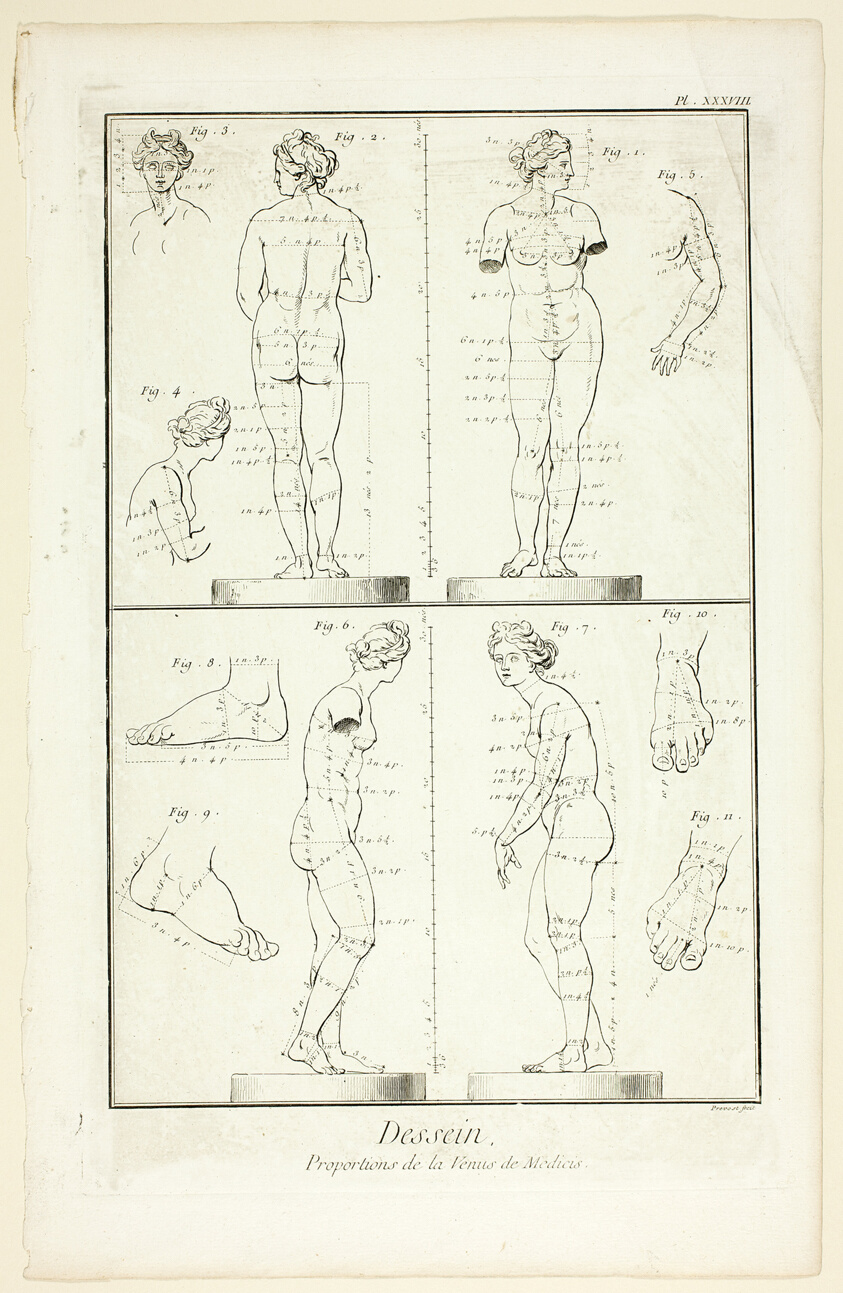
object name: Print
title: Design: Proportions of the Medici Venus, from Encyclopédie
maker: Benoît-Louis Prévost (French, c. 1735-1809); published by André le Breton (French, 1708-1779), Michel-Antoine David (French, c. 1707-1769), Laurent Durand (French, 1712-1763), and Antoine-Claude Briasson (French, 1700-1775)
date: 1762/77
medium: Etching, with engraving, on cream laid paper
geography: France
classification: etching; print; prints and drawing